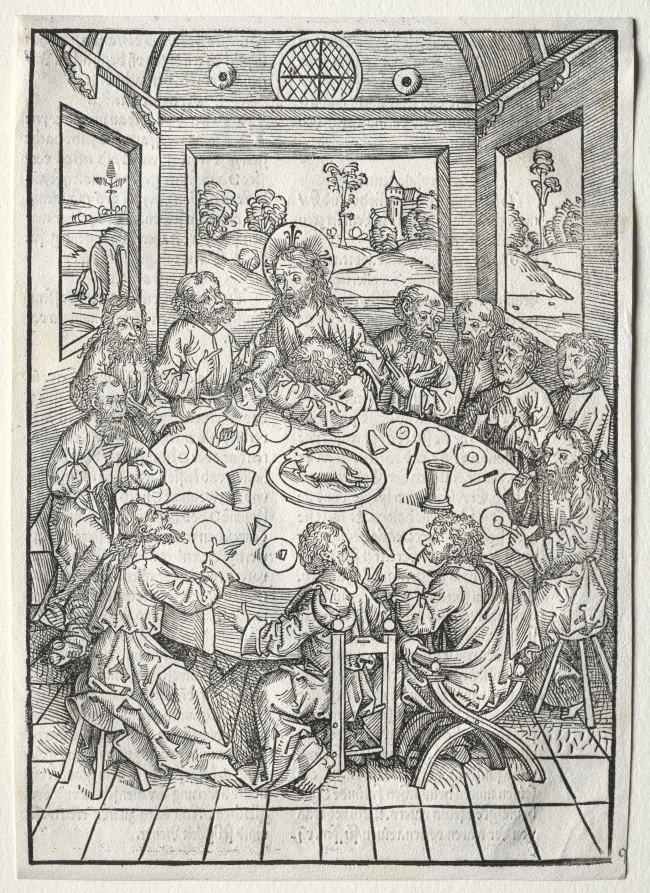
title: Der Schatzbehalter: The Last Supper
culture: Germany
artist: Michael Wolgemut (German, 1434–1519)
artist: Wilhelm Pleydenwurff (German, 1450–1494)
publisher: Anton Koberger (German, 1435-1513)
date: 1491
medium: woodcut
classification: Print